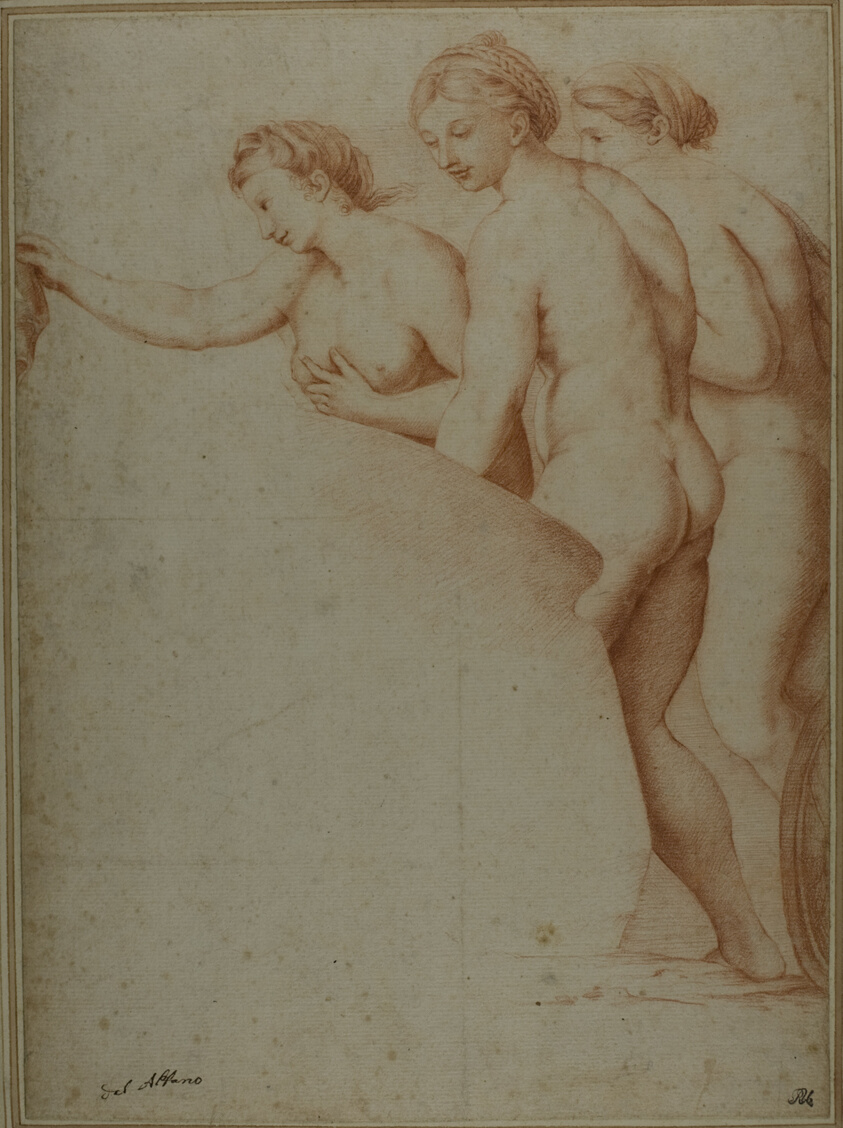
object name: Drawing and Watercolor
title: Three Nude Women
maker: after Raffaello Sanzio, called Raphael, and his workshop; Italian, 1483-1520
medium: Red chalk on ivory laid paper, laid down on card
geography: Italy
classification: chalk; drawings (visual works); prints and drawing